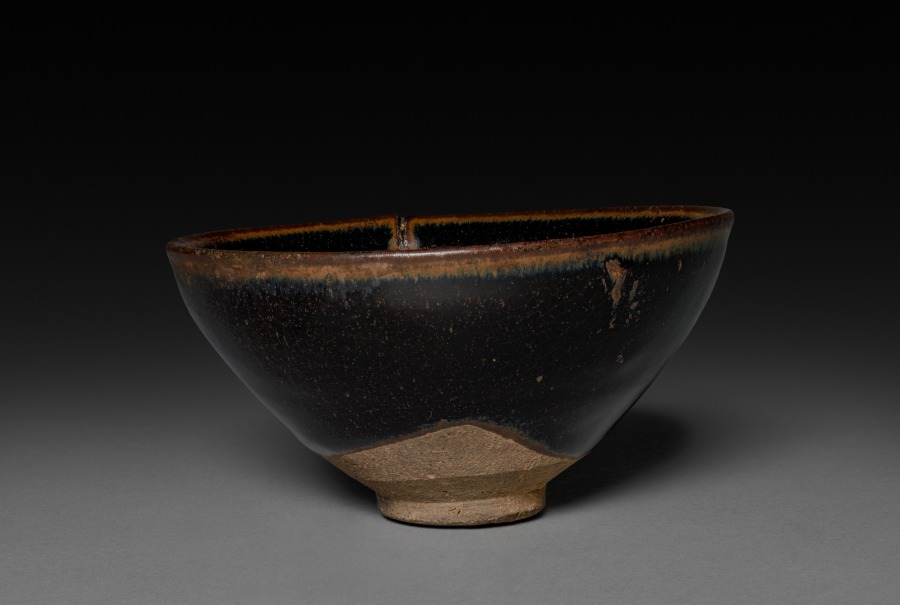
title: Tea Bowl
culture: China, near Shui ch'i, Song dynasty (960-1279)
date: 960–1279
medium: Stoneware, Jian ware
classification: Ceramic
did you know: Jian ware was very popular with the tea cultures in China and Japan.